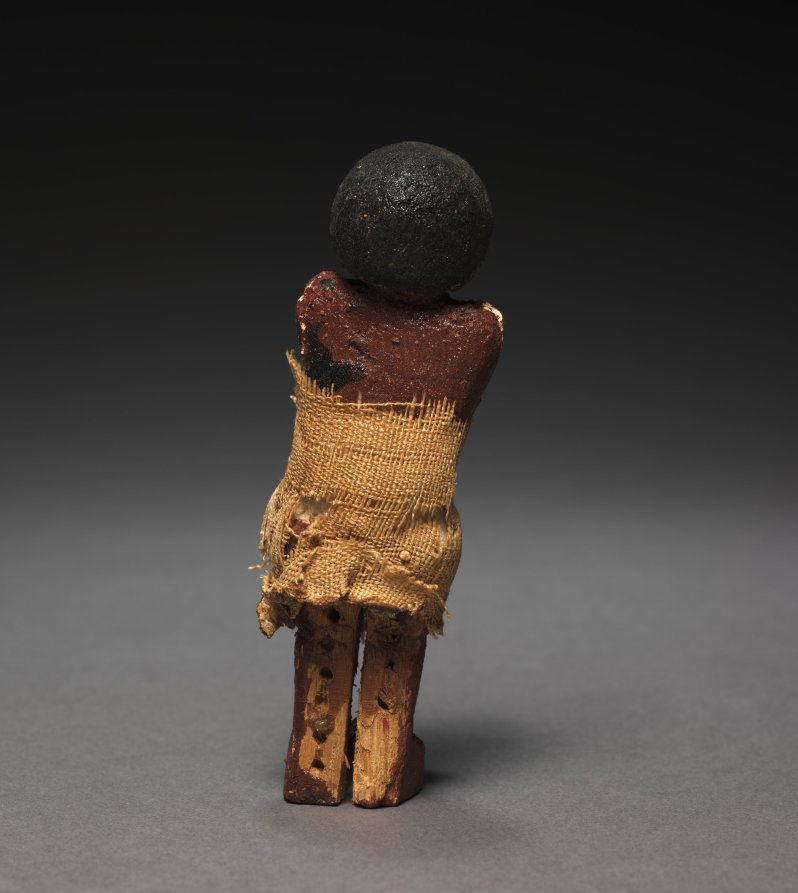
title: Seated Model Sailor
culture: Egypt, Middle Kingdom (2040–1648 BCE), Dynasties 11–12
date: 2000–1000 BCE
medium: painted sycamore fig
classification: Funerary Equipment